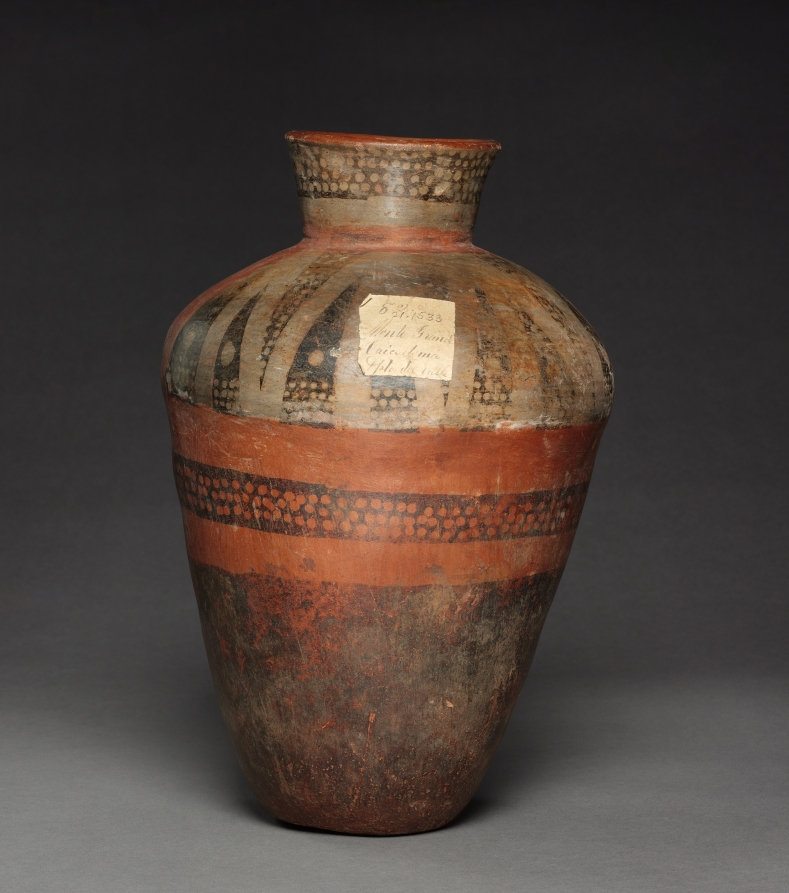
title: Vase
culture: Colombia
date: 1000–1550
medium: pottery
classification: Ceramic